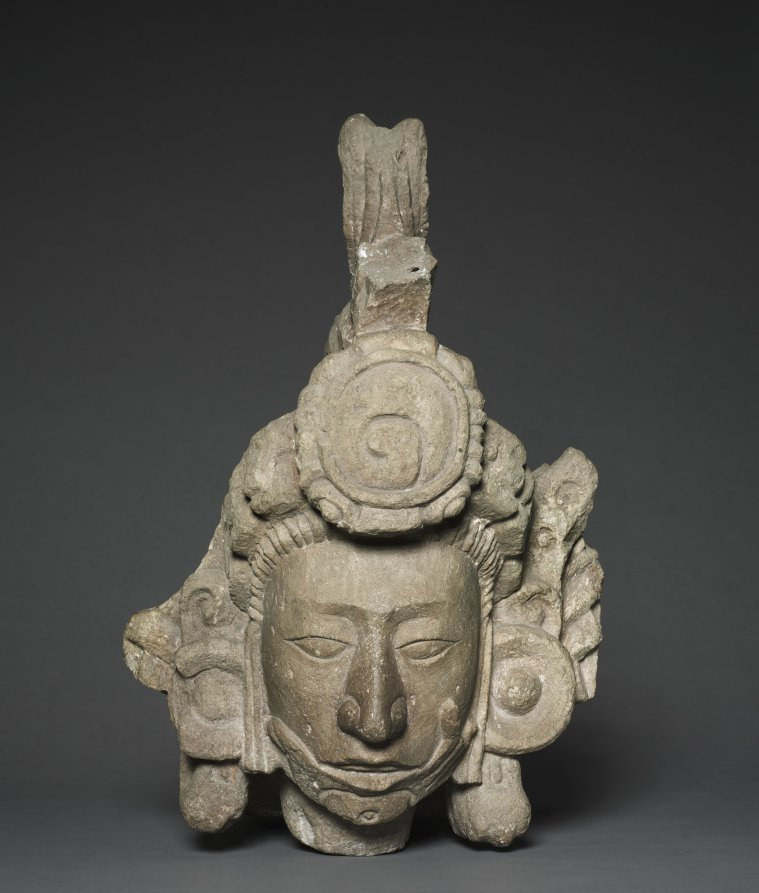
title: Head of a Young Noble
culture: Honduras, Copán, Structure 10L-22A, Maya style (250-900)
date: 746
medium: stone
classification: Sculpture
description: This young noble may be a political official of 8th-century Copán, an important site in eastern Maya territory. The noble, who embodies the Maya ideal of masculine beauty, wears circular ear ornaments and a headband, above which the tied hair rises. The meaning of the disembodied hand that cups the chin is debated. The head, collected by Harvard archaeologists in the 1890s, comes from the facade of a building may have been used as a council house by a Copán ruler and his advisors during a crisis that rocked the city’s ruling dynasty. On the structure’s upper level, above woven mat signs that symbolized political authority, eight figures were enthroned in T-shaped recesses. This head is from one of these figures. Beneath each recess was a hieroglyph thought to name an important town (or family) within Copán’s domain. The figures may represent these towns’ advisors to the king, whose image crowned the structure.